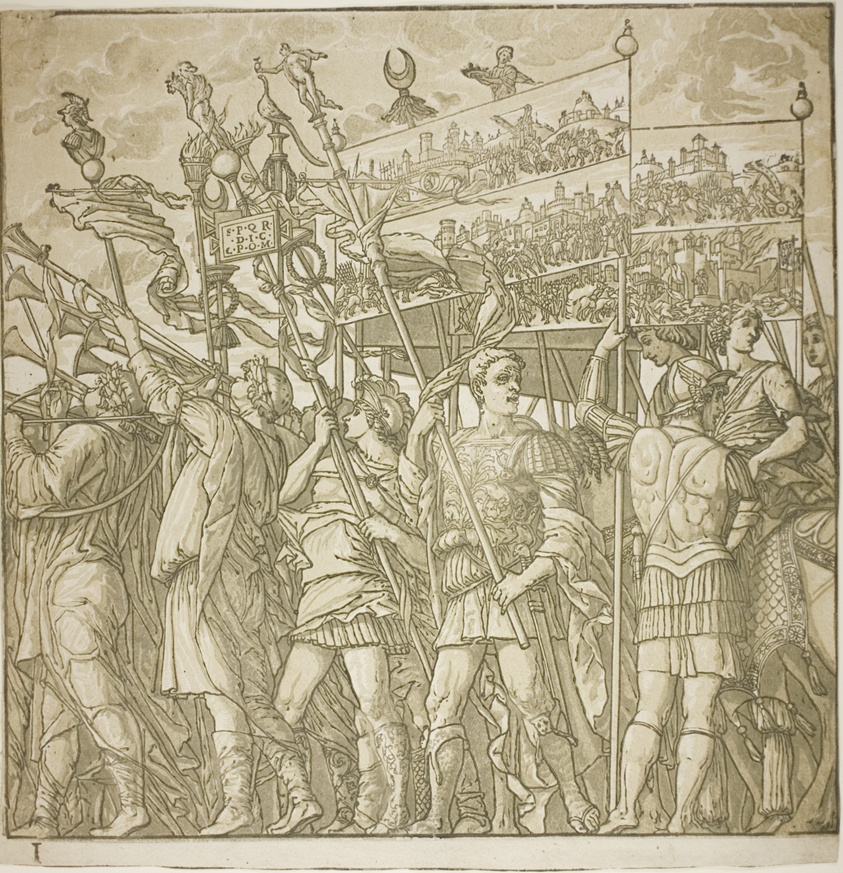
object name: Print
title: Triumph of Caesar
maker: Andrea Andreani (Italian, 1558/59–1629); after Andrea Mantegna (Italian, 1431–1506)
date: 1599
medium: Chiaroscuro woodcut from four blocks in black and light, medium and dark greenish gray on off-white laid paper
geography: Italy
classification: chiaroscuro woodcut; woodcut; print; prints and drawing